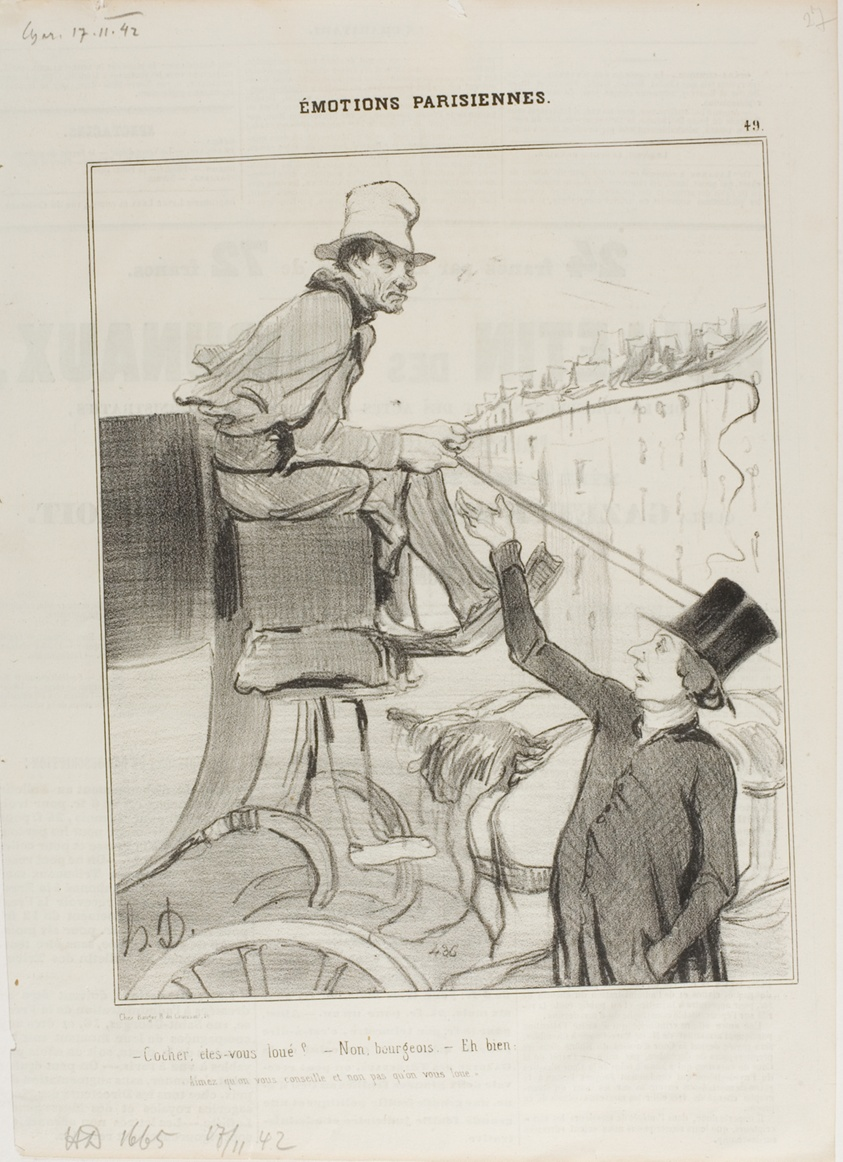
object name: Print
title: “- Coachman, are you booked? - No, citizen. - Well then: 'you'd rather accept being advised than hired out?,'” plate 49 from Émotions Parisiennes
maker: Honoré Victorin Daumier; French, 1808-1879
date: 1842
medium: Lithograph in black on white wove paper, with letterpress verso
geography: France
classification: lithograph; print; prints and drawing